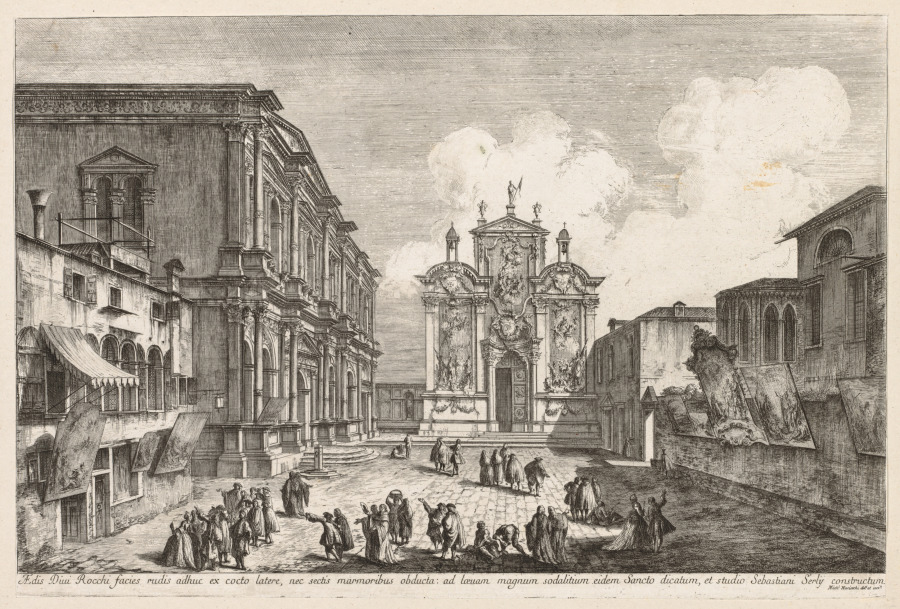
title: Views of Venice: Campo S. Rocco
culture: Italy, 18th century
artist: Michele Marieschi (Italian, 1710–1743)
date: 1741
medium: etching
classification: Print